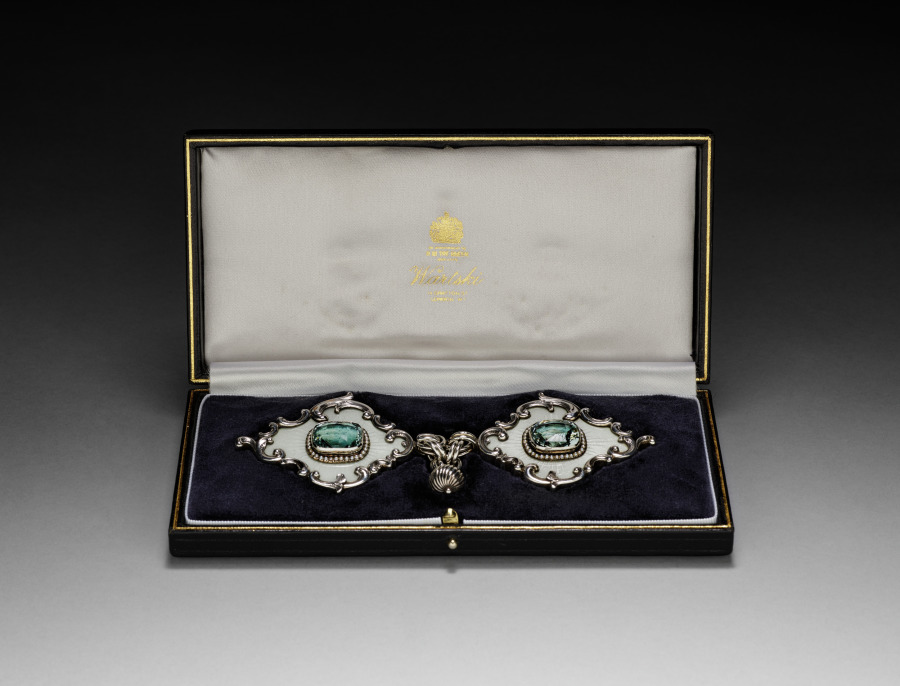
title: Cloak Clasp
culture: Russian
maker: House of Fabergé (Russian, 1842–1918)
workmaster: Henrik Wigström (Russian, 1862–1923)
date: c.1903–8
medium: aquamarine, half pearl bezel, oyster guilloché enamel, silver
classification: Jewelry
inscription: Inscribed with the Cyrillic initials “HW”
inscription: “88” silver standard